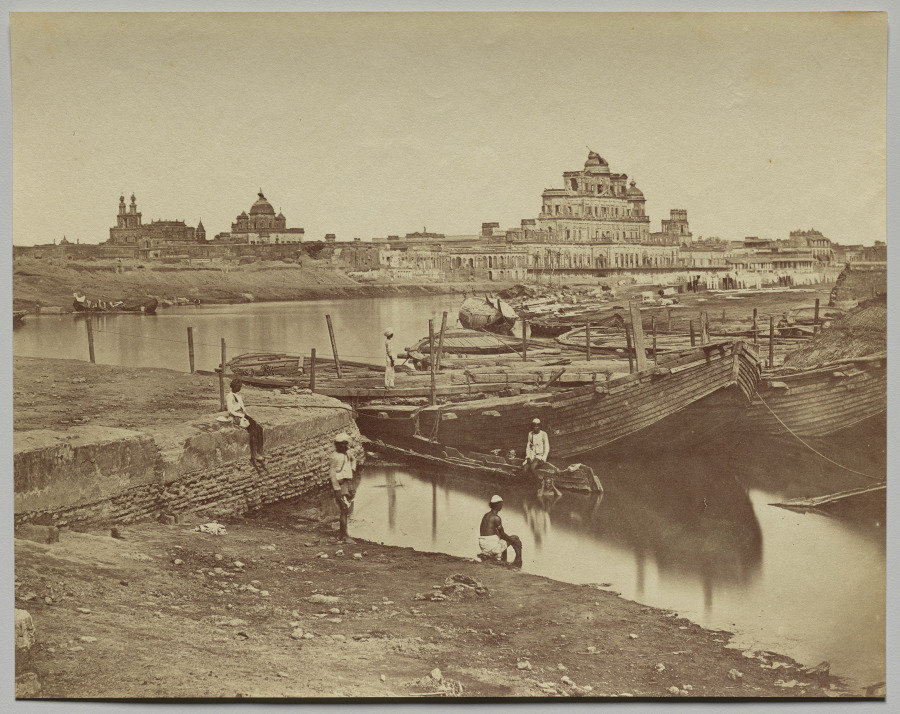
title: Bridge of Boats over the Gumti River near the Chattar Manzil and Fusseed Bakah or Old Palace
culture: England, 19th century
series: Lucknow After the Siege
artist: Felice A. Beato (British, 1832–1909)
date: 1858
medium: albumen print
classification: Photograph